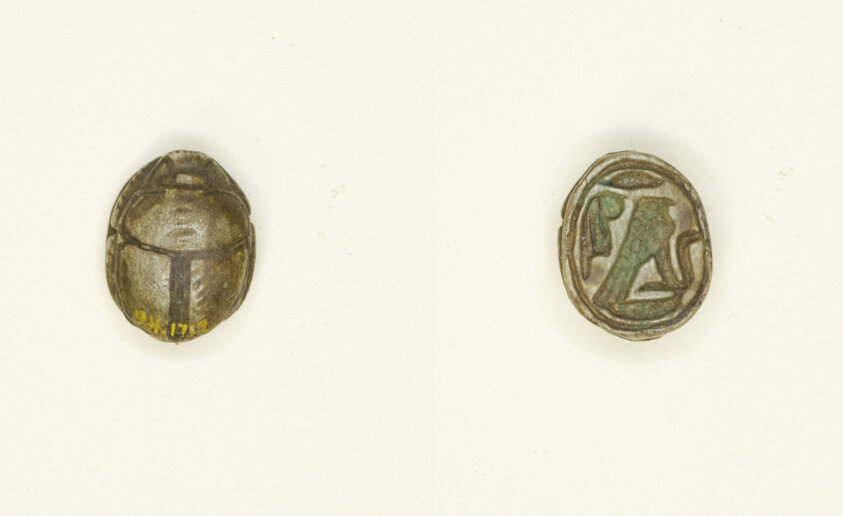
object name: Costume and Accessories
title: Scarab: Falcon with Cobra and Ma’at Feather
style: egyptian, ancient, middle kingdom, new kingdom, second intermediate period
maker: Egyptian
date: Middle Kingdom–New Kingdom, Dynasties 12–18 (about 2055–1295 BCE)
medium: Glazed steatite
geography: Egypt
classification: scarab; ancient art; costume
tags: Hieroglyphs, falcons, feathers, insects, serpents, snakes